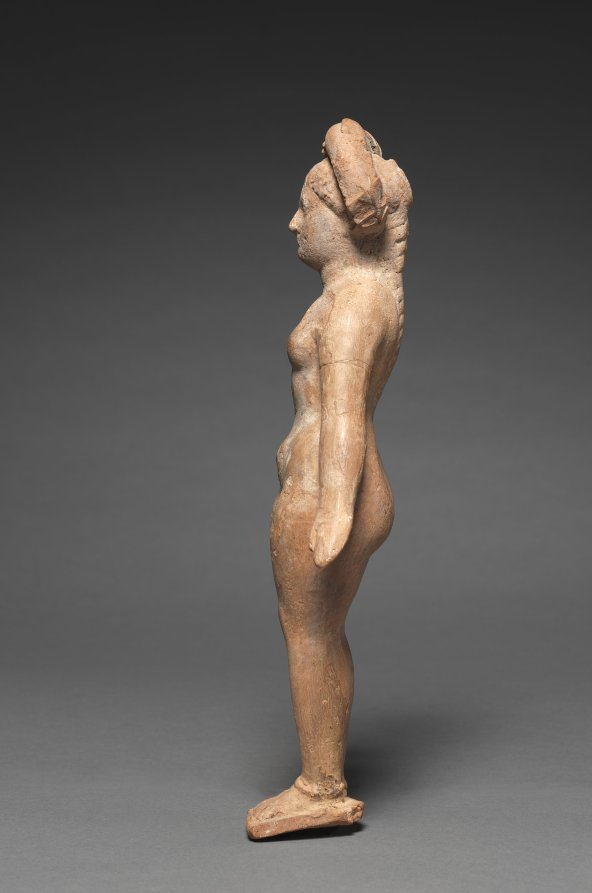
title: Fertility Goddess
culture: Pakistan, Gandhara, reportedly Charsada, early Kushan period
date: 100s CE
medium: terracotta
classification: Sculpture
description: Female figures fashioned from terracotta were found at large man-made pools of water in early Buddhist sacred compounds. They indicate the importance of art and rites associated with fertility and childbirth among the Buddhist laity, of which women were a major component. The wreath, small breasts, and gentle modeling of her full-hipped body associate this figure with Greco-Roman imagery.